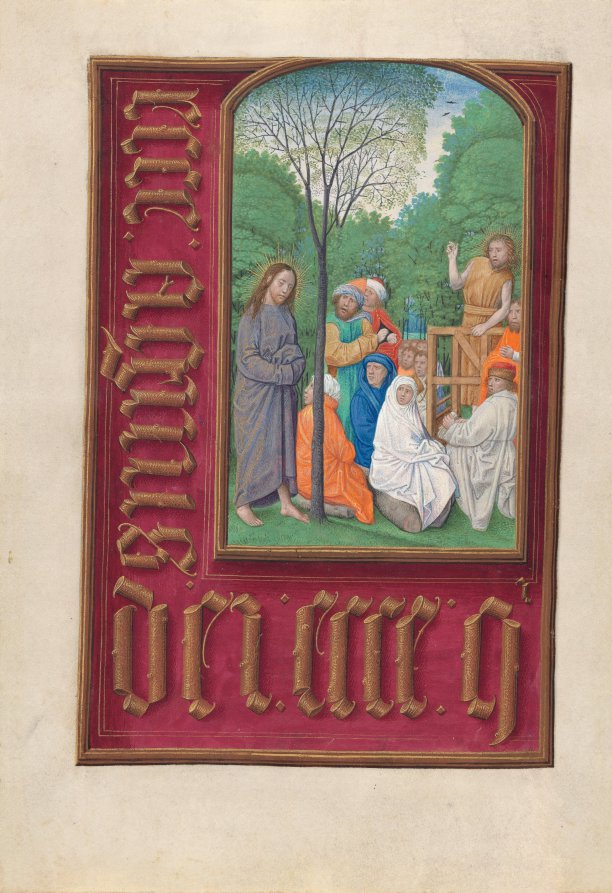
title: Hours of Queen Isabella the Catholic, Queen of Spain: Fol. 169v, St. John the Baptist Preaching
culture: Flanders, Ghent and Bruges, late 15th century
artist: Master of the First Prayerbook of Maximillian (Flemish, c. 1444–1519)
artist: and Associates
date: c. 1500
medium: ink, tempera, and gold on vellum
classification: Bound Volume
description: This manuscript was illuminated by a circle of at least five highly organized manuscript painters active in the Flemish cities of Ghent and Bruges. The principal illuminator was Alexander Bening, who painted the majority of the book's miniatures. Manuscripts produced by this circle of artists are renowned for the decoration of their borders, which typically feature a rich variety of realistically-painted flowers, birds, and butterflies. This prayer book, called a book of hours, was intended not for a cleric, but for the private devotions of a lay person-in this case, Isabella the Catholic, Queen of Spain (1451-1504). Isabella's coat of arms embellishes the book's frontispiece. It is unlikely that the book was commissioned by the Queen herself; rather, she probably received it as a diplomatic gift from someone courting her patronage, perhaps Cardinal Francisco Jimenez de Cisneros. A Franciscan friar, Jimenez was dependent upon Isabella for his advancement, first to the post of Queen's confessor in 1492, and then to Archbishop of Toledo in 1495.